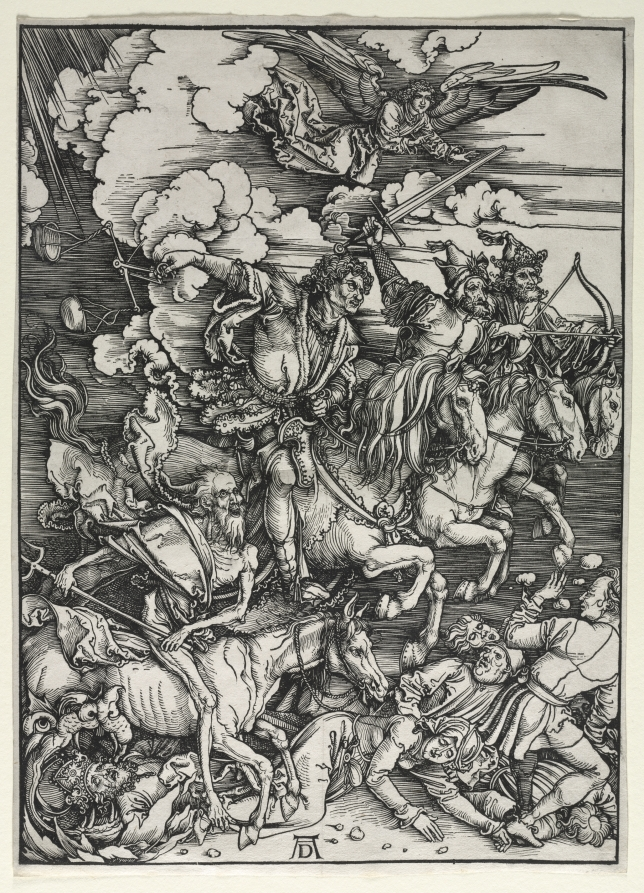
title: The Four Horsemen, from The Apocalypse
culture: Germany, late 15th-early 16th Century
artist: Albrecht Dürer (German, 1471–1528)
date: c. 1498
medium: woodcut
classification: Print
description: In 1498 Dürer published a book illustrating the Revelation of John or the Apocalypse of John, the last book of the New Testament. The images were unique in their large scale, breadth of concept, and unity of design. The first book to be both published and illustrated by the artist, it comprised a title page and 15 full-sheet woodcuts featuring text on the verso of all the sheets except the last one. Often visible through the paper, the text mars the image on the recto of the sheet. The finest impressions were most often printed without text, like this one of The Four Horsemen. Here, Dürer suggested the vigorous momentum of the horsemen through the windblown clothing of the riders, the windswept clouds, and the figures trampled beneath the hooves of the approaching horses.